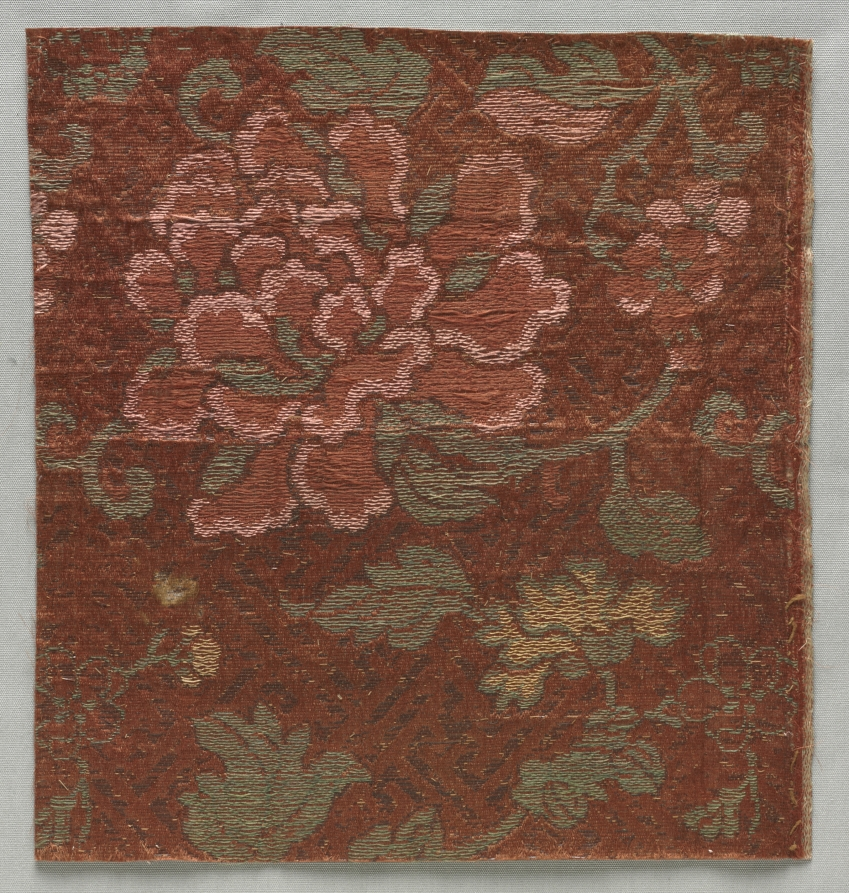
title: Textile Fragment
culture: Japan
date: 1800s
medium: silk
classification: Textile